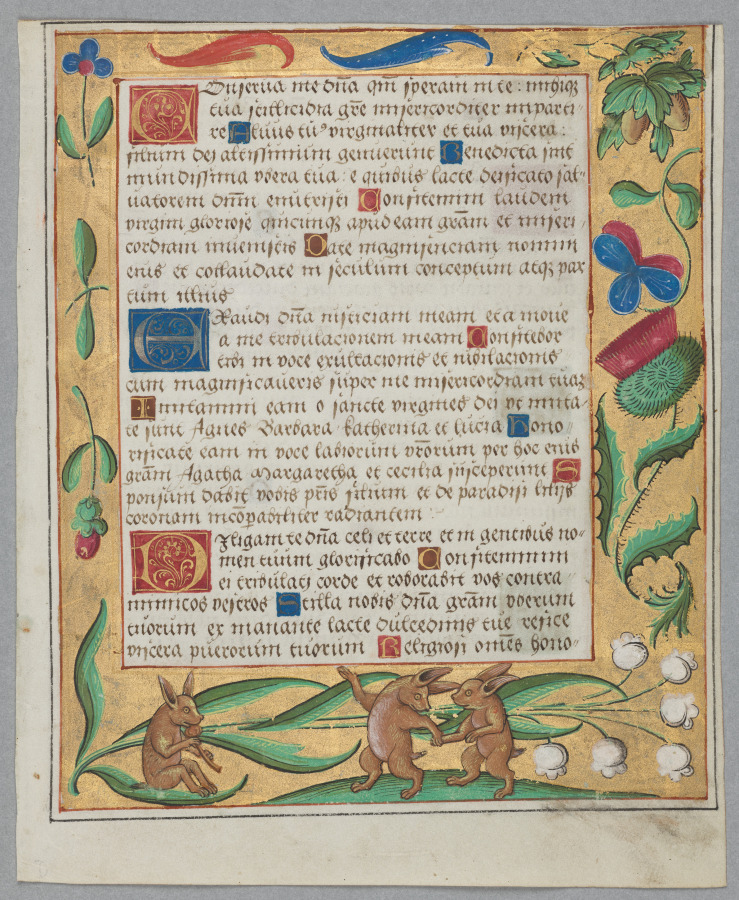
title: Leaf from a Psalter and Prayerbook: Rabbits Dancing (recto)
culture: Germany, Hildesheim (?), 16th century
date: c. 1524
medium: Ink, tempera and liquid gold on vellum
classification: Manuscript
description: This leaf from a psalter and prayerbook is intricately decorated and was probably produced for use in a private noble family. The prominent mention of Saint Godehard (died 1038), Bishop of Hildesheim, in the original manuscript suggests that it was produced for use in the diocese of Hildesheim (Norther Germany).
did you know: On the front side are three rabbits, one playing a Hirtenschalmei (shepherd's shawm). This instrument is mentioned in medieval literature and poetry as being played by rustic types.